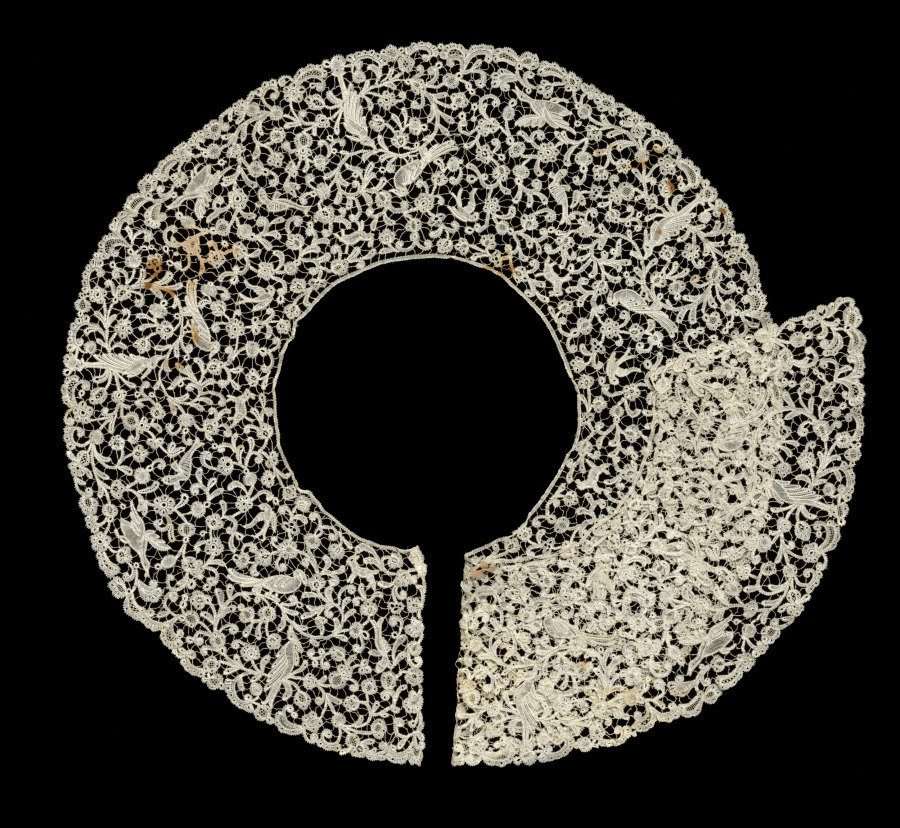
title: Lace Collar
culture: Flanders or Italy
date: 1800s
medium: Bobbin lace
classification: Lace